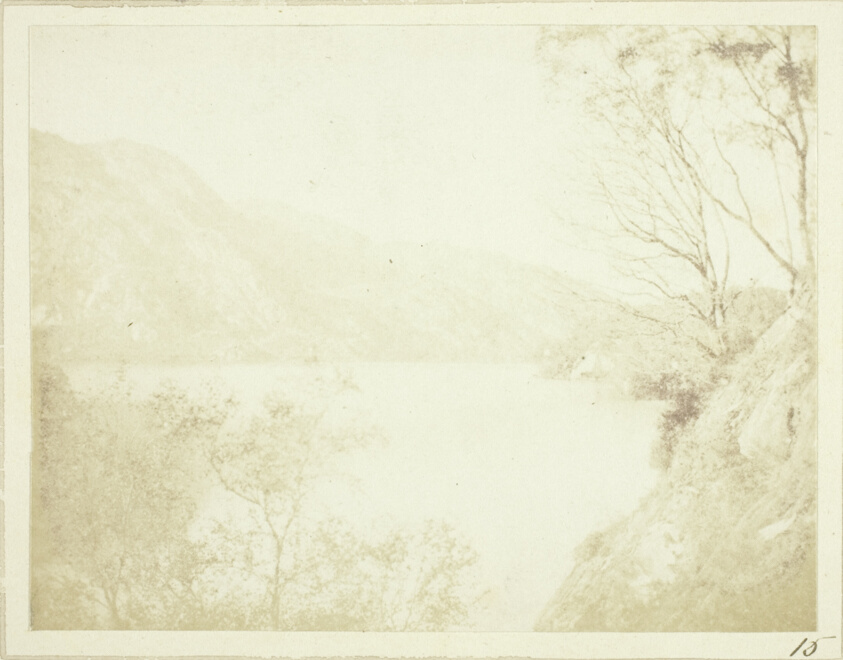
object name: Photograph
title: Scenery of Loch Katrine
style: 19th century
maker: William Henry Fox Talbot (English, 1800–1877)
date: 1844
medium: Salted paper print, plate XV from the album "Sun Pictures in Scotland" (1845)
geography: England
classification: salted paper print; photographic process; photography; photograph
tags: Collected by Hugh Edwards